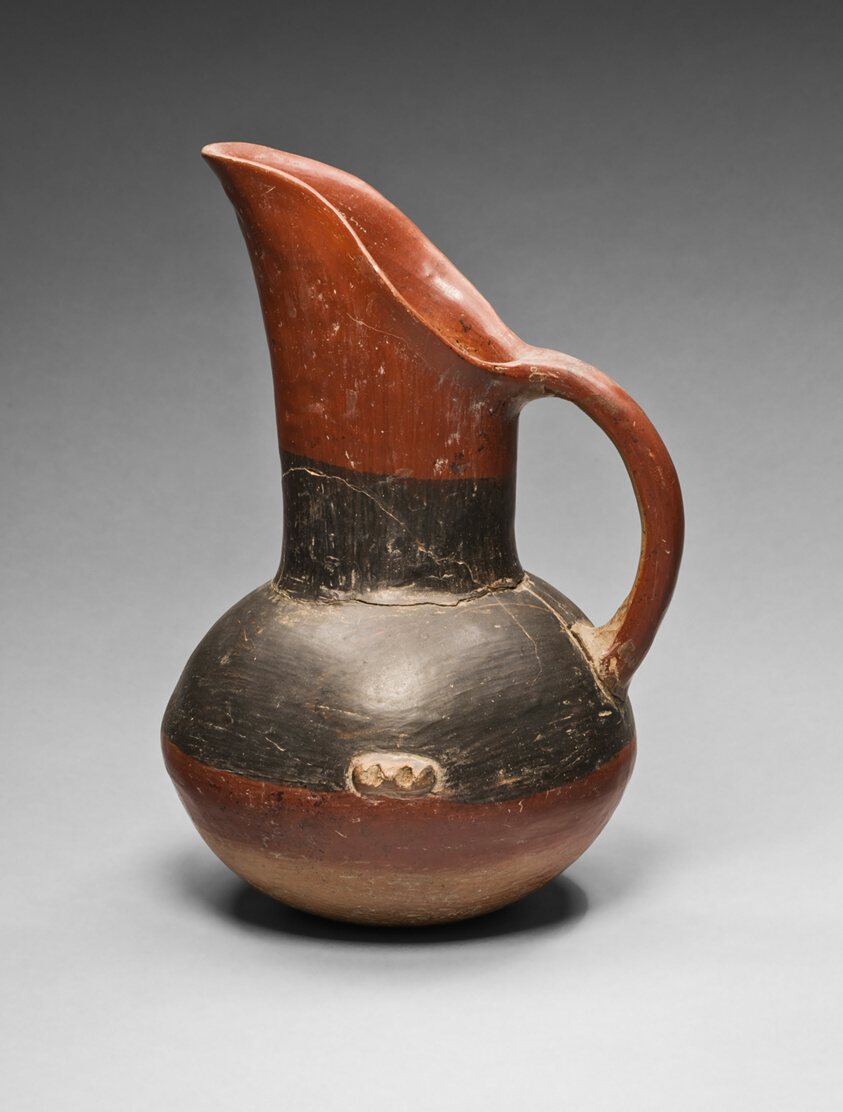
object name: Vessel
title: Polychrome Pitcher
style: cholula, americas, mesoamerican, Arts of the Americas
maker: Cholula (Cholula, Mexico)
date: 1400–1520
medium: Earthenware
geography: Cholula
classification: pitcher (vessel); earthenware; art of the americas; vessel; ceramics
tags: servingware